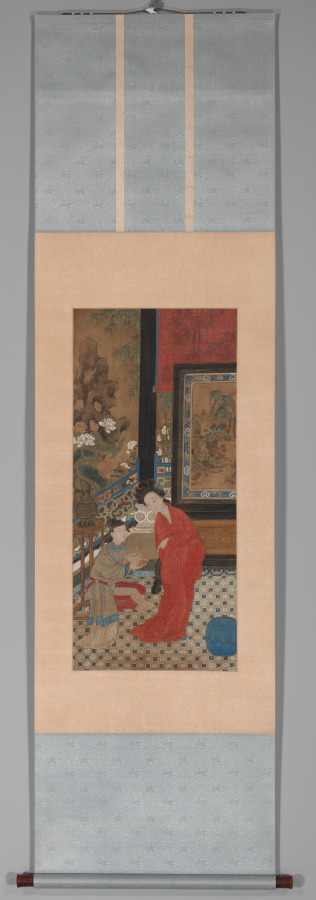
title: Yang Guifei Leaving the Bath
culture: China, Qing dynasty (1644-1911)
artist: Gu Jianlong (Chinese, 1606–after 1689)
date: 1700s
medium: Hanging scroll; ink, colors and gold on silk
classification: Painting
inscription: 丙辰冬至後二日 雲臣顧見龍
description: This painting relates to the legendary love story between Tang dynasty (618–906) emperor Xuanzong and his consort, the beautiful Yang Guifei. Set in what appears to be an 18th-century southern interior, the artist depicts Yang Guifei in a fashionable dress of semitransparent red gauze. Due to the warm and humid climate in China’s southeast, local silk workshops specialized and excelled in making airy gauze garments. Yang’s nude body can be seen through the red robe as she leaves the bath. Her servant offers her a bowl of soup. The presence of a male figure would have been a breach of customary protocol; cross-dressed as a male scholar, the earrings reveal that Yang’s attendant is in fact a girl.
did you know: Due to the warm and humid climate in China’s southeast, silk workshops specialized in making airy gauze garments, like the one worn by Yang Guifei here.